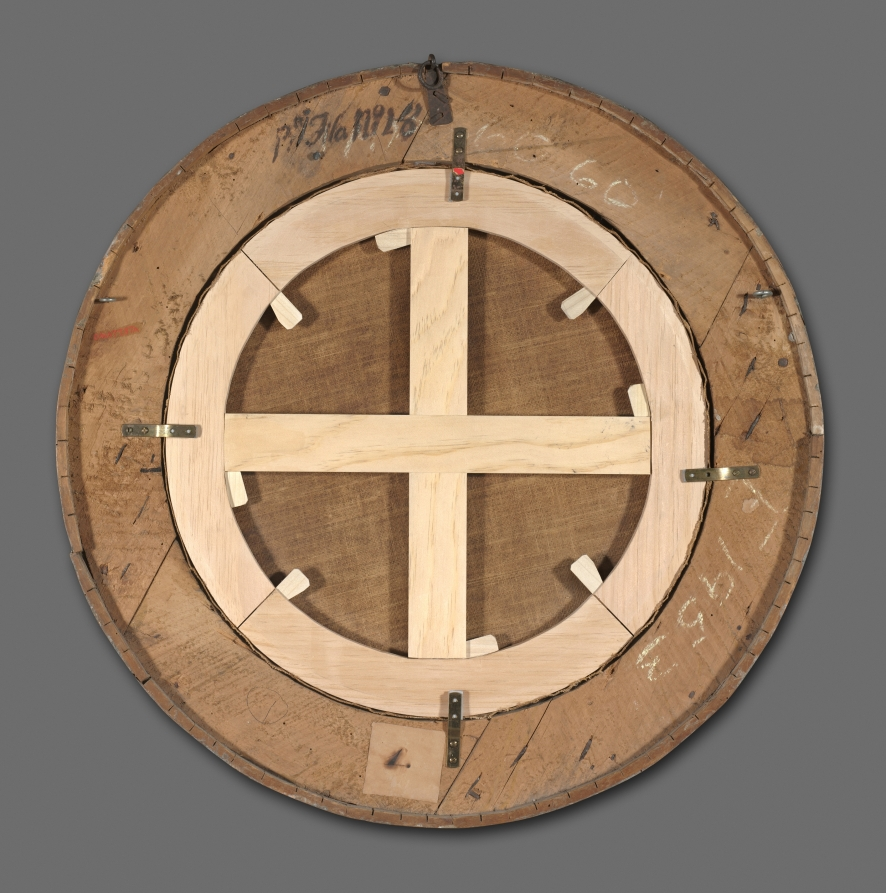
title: Scenes of Witchcraft: Night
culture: Italy, 17th century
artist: Salvator Rosa (Italian, 1615–1673)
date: c. 1645–1649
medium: oil on canvas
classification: Painting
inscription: Signed: "SR [monogram]"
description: In the pitch black of night, two groups of men are gathered in a forest. To the left, travelers apprehensively pause to watch a magician conjure terrifying apparitions. Since the Middle Ages, necromancy, the act of communing with the dead, was associated with male sorcerers. In Rosa's painting, the wizened necromancer who stands tall and resolute directly below a classical column is reminiscent of Moses, a predecessor to Renaissance depictions of sorcerers. Rosa's learned magicians not only invoke associations with philosophers and intellects, but they would have also referred to the artist himself and the intellectual elite with whom he associated in Florence. Just as a powerful magician could conjure strange creatures with his wand, so too could Rosa shape a strange world with his originality, intelligence, and the skillful use of paint and brush.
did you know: The artist chose the painting's shape to reference the foundational role of the circle in practicing magic.